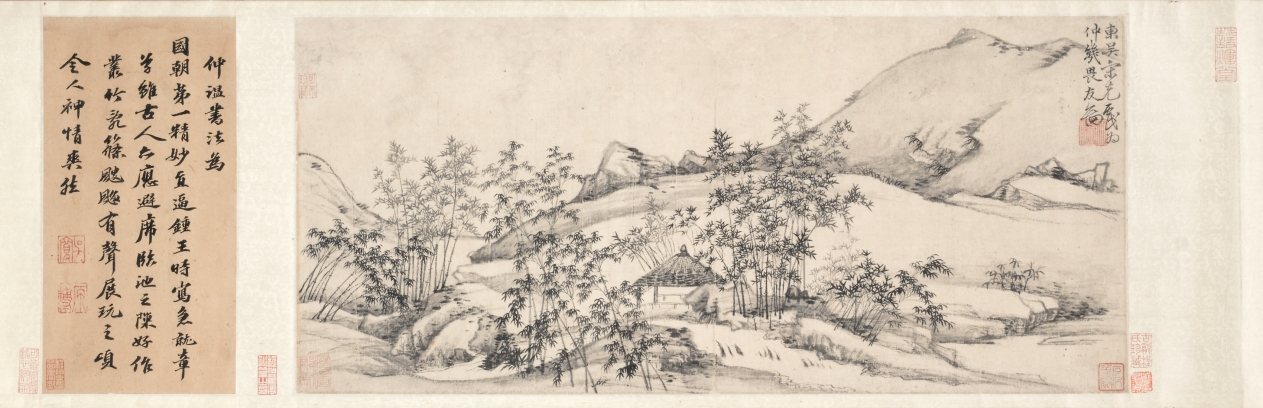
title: Landscape with Bamboo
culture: China, Yuan dynasty (1271-1368)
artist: Song Ke (Chinese, 1327–1387)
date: 1300s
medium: Handscroll; ink on paper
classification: Painting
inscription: 東吳宋克戲為仲幾畏友圖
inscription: 2 colophons and 14 additional seals: 1 seal of Yü Chung-chi (14th c.); 1 seal of Wu Ch'eng (1469 jinshi); 1 colophon and 2 seals of Wu K'uan (1435–1504); 1 colophon and 9 seals of Cheng Qi (1911–1988); 1 seal unidentified.